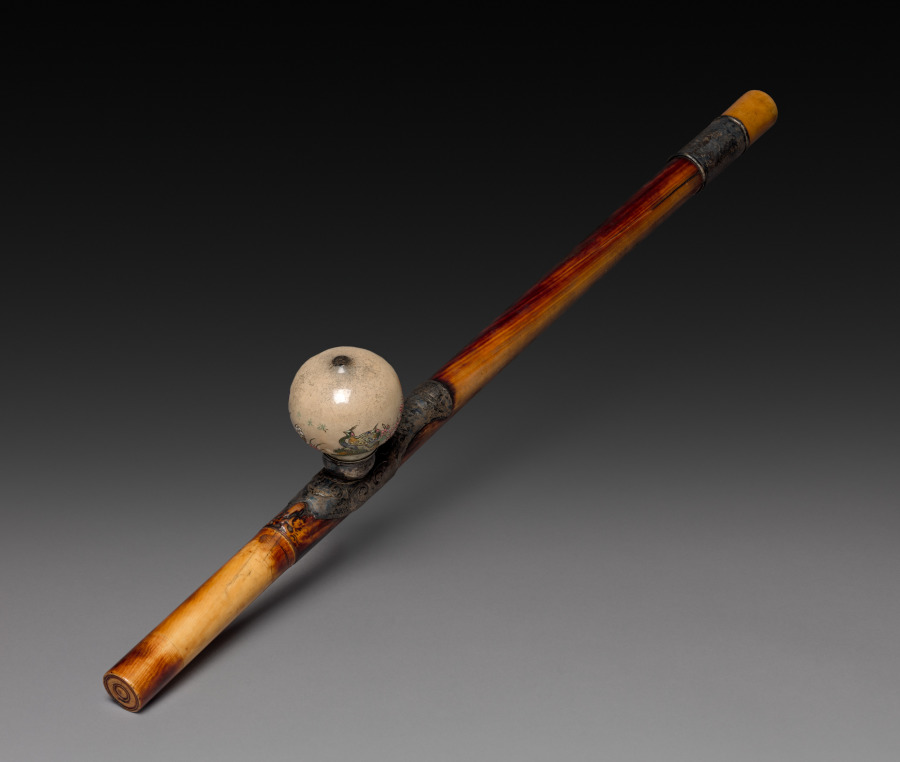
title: Opium Pipe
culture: China, Qing dynasty (1644-1911)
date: 1800s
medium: ivory stem decorated with silver and enamel work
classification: Miscellaneous